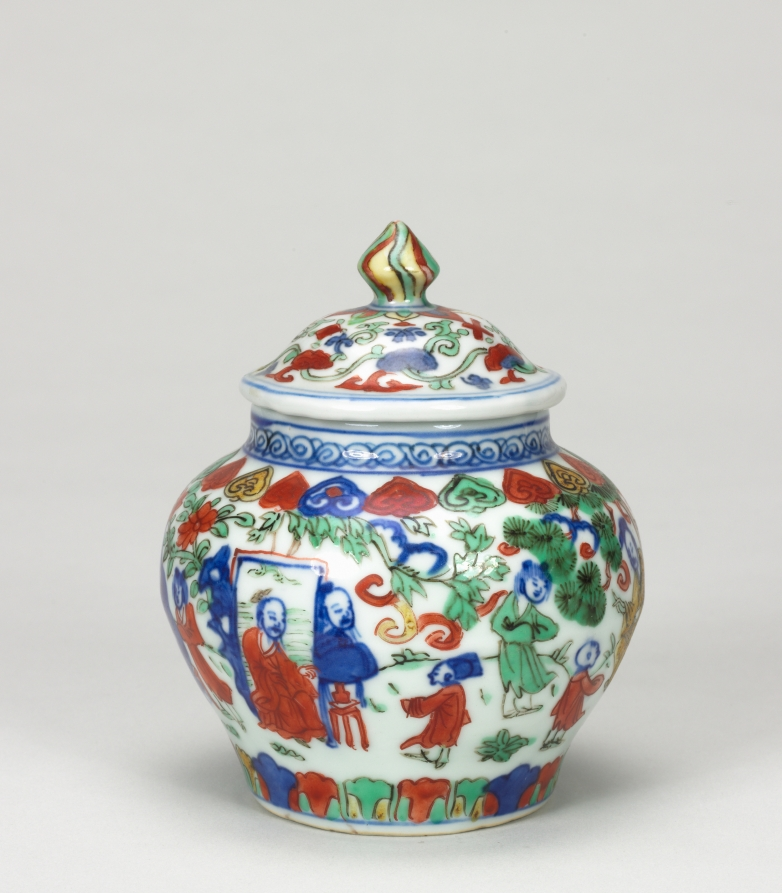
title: Covered Jar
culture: China, Jiangxi province, Jingdezhen kilns, Ming dynasty (1368-1644), Wanli reign (1573-1620)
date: 1573–1620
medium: porcelain with blue underglaze decoration and overglaze enamels in red, green, and yellow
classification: Ceramic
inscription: 大明萬曆年製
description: In the Ming (1368–1644) and Qing (1644–1911) dynasties, luxury items became more affordable to larger parts of the society, including women, merchants, and literati in non-official positions. Imperial patronage and a growing urban population encouraged consumption of luxury goods and local craftmanship. This covered porcelain jar has blue underglaze and overglaze in red, green and blue enamels. It shows Ming dynasty advancements in porcelain decoration and the creative mind of the talented artisans who made it.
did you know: This jar is painted with 16 figures of all ages enjoying a garden setting.